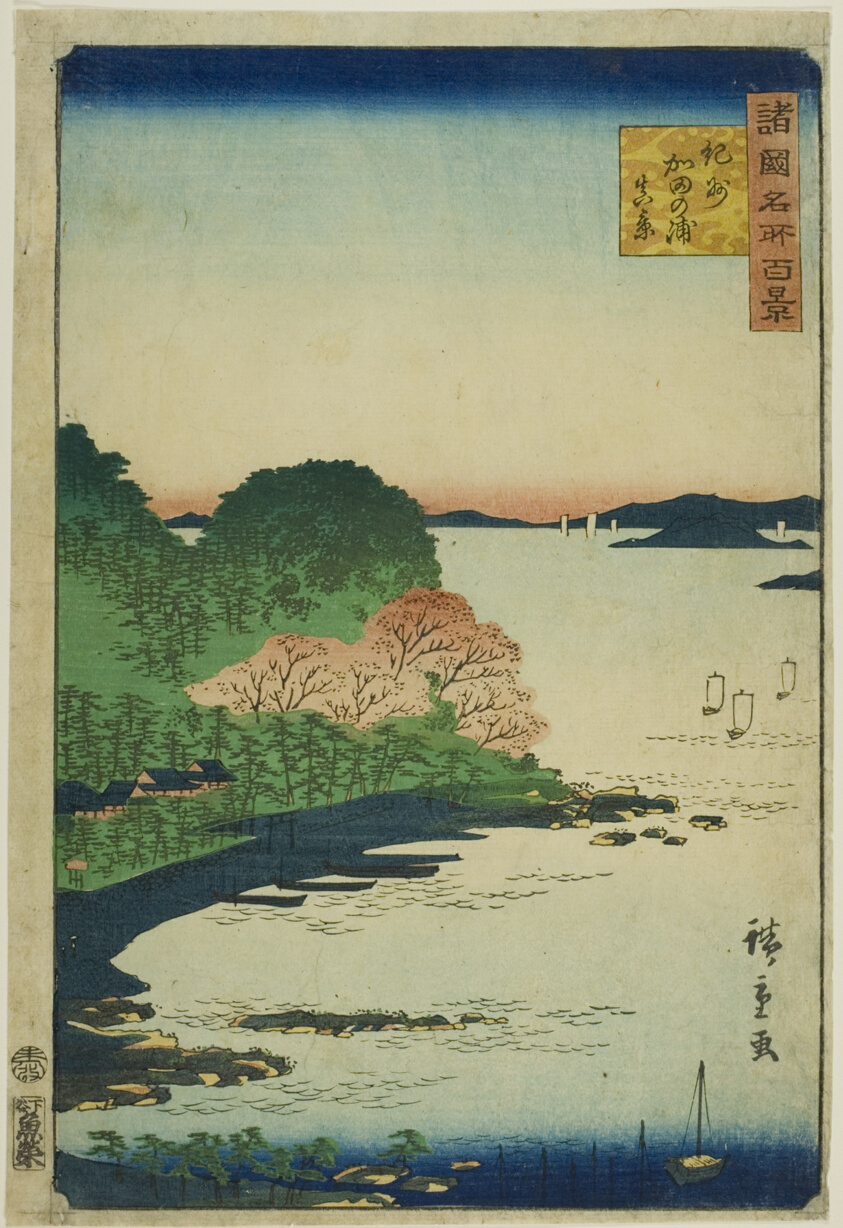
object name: Print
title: Actual View of Kata Bay, Kishu Province (Kishu kata no ura shinkei), from the series “One Hundred Famous Views in the Various Provinces (Shokoku meisho hyakkei)”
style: Japanese (culture or style)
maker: Utagawa Hiroshige II (Shigenobu) (Japanese, 1826–1869)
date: 1859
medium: Color woodblock print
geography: Japan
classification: woodblock print; print